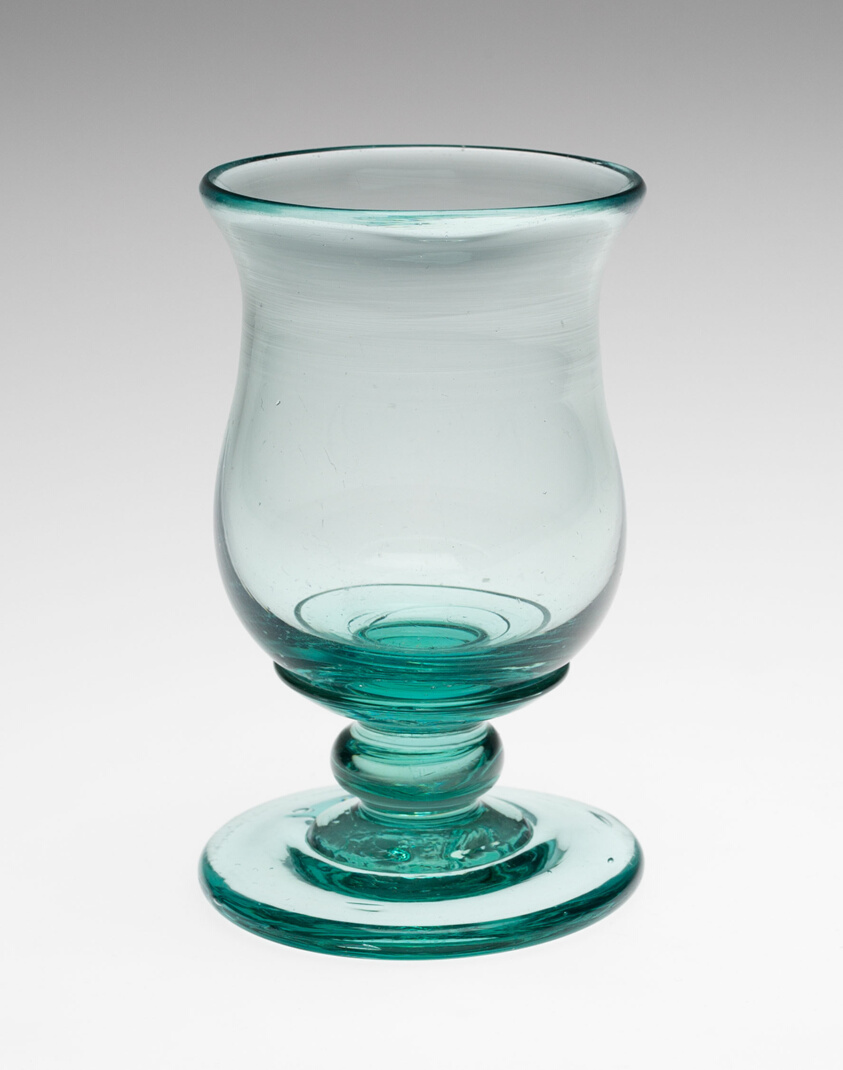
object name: Glass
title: Goblet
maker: Attributed to Redford Glass Company; American, 1831–51; Redford, New York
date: 1831–51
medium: Blown glass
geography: New York City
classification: drinking vessel; glass; american decorative arts; american arts; decorative arts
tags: dining, drinking